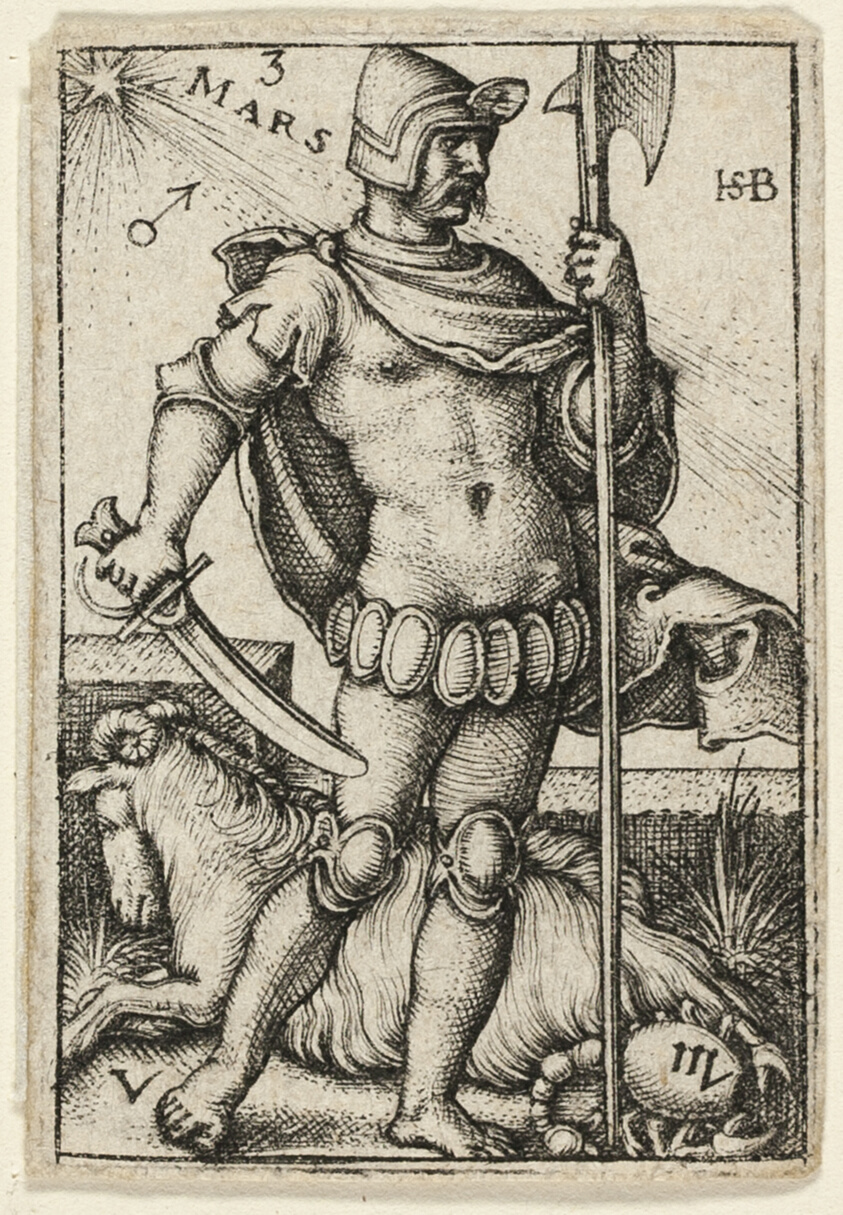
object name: Print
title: Mars, plate three from The Seven Planets with the Zodiacs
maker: Sebald Beham; German, 1500-1550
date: 1539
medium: Engraving in black on ivory laid paper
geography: Germany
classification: engraving; paper; print; prints and drawing